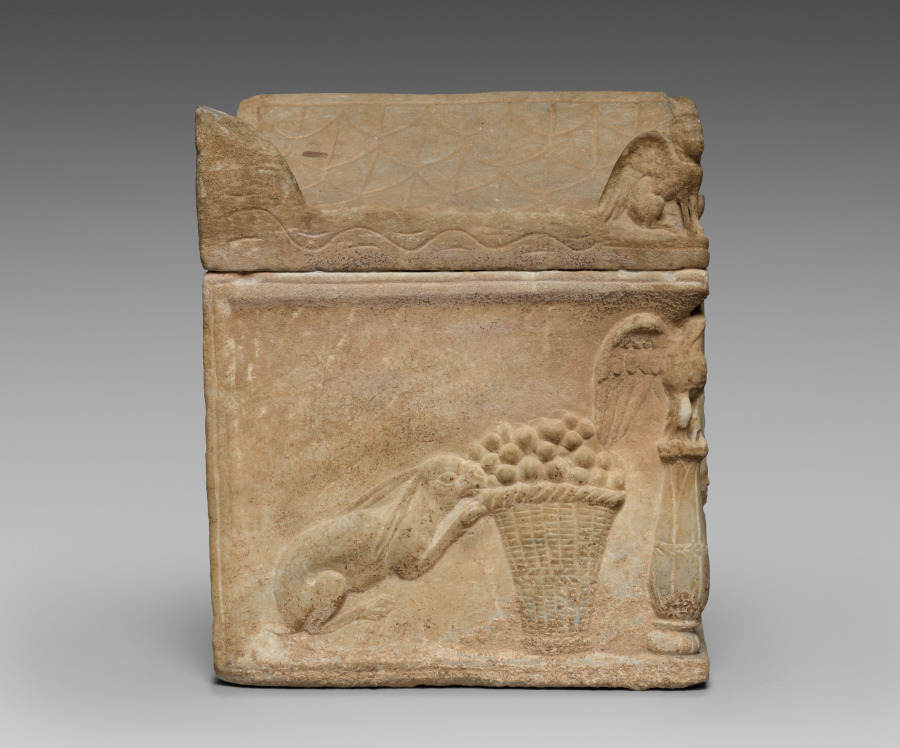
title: Cinerary Box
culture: Italy, Roman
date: 1–100 CE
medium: marble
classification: Sculpture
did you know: The central rectangular plaque would have been inscribed with an epitaph, either painted or carved.